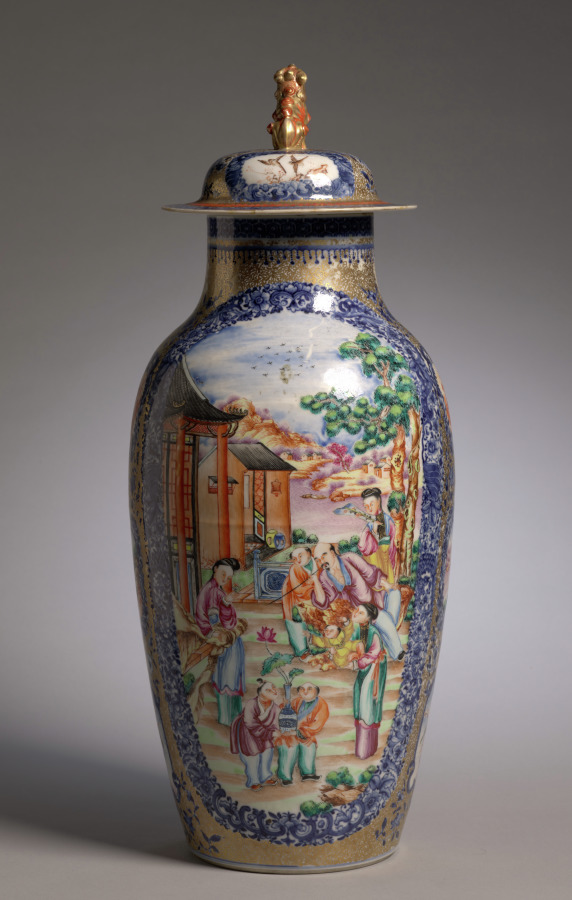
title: Covered Vase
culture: China, Chinese Export, 18th century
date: c. 1770–80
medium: porcelain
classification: Ceramic